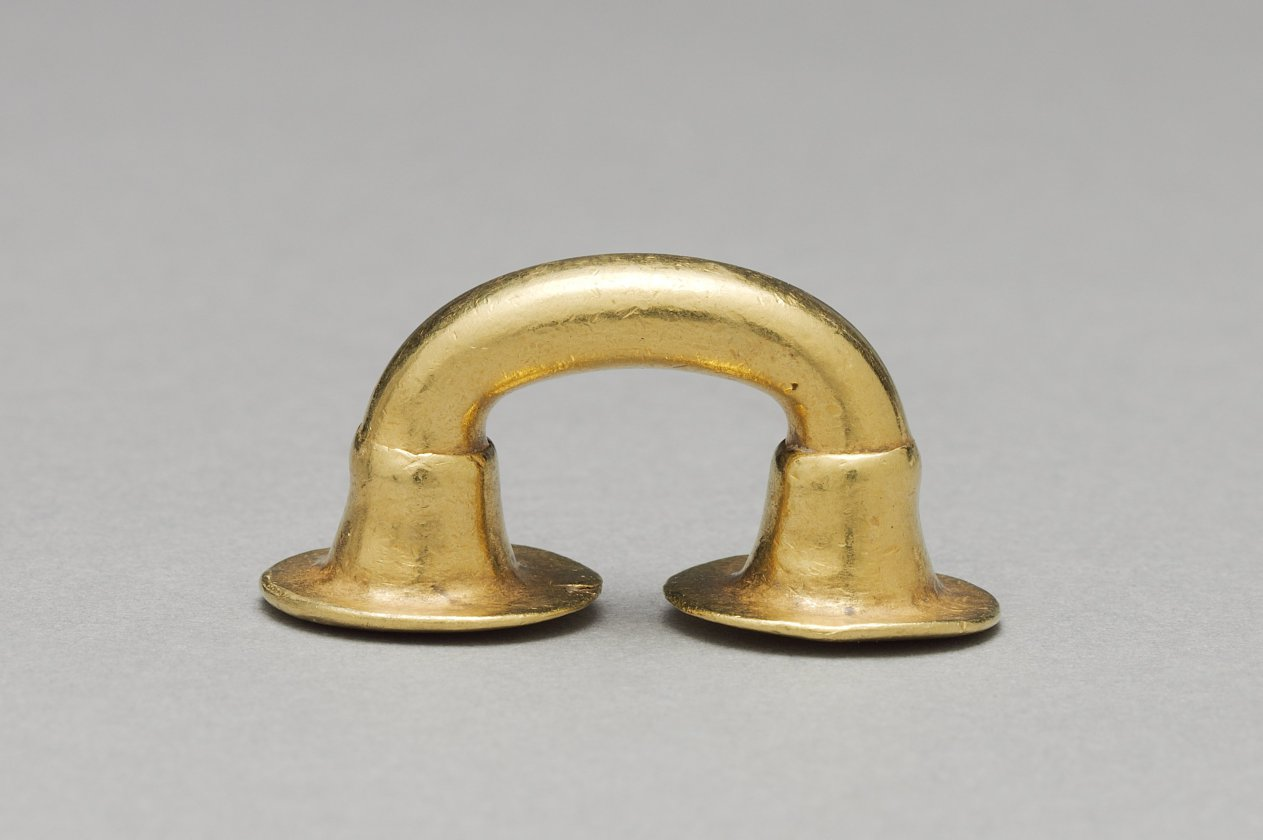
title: Nose Ornament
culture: Colombia, Sinú style, 5th-11th century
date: c. 400–1000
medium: hammered gold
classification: Jewelry